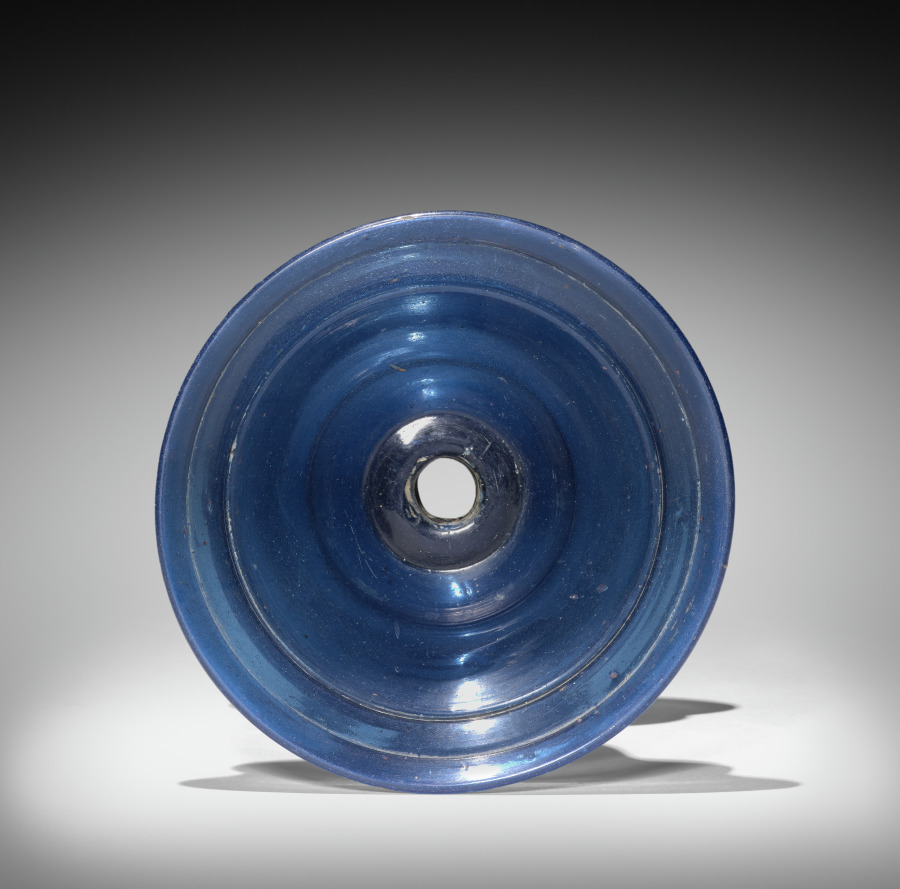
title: Bowl with Stand (stand)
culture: Syria, Roman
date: 100–400 CE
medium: glass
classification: Glass